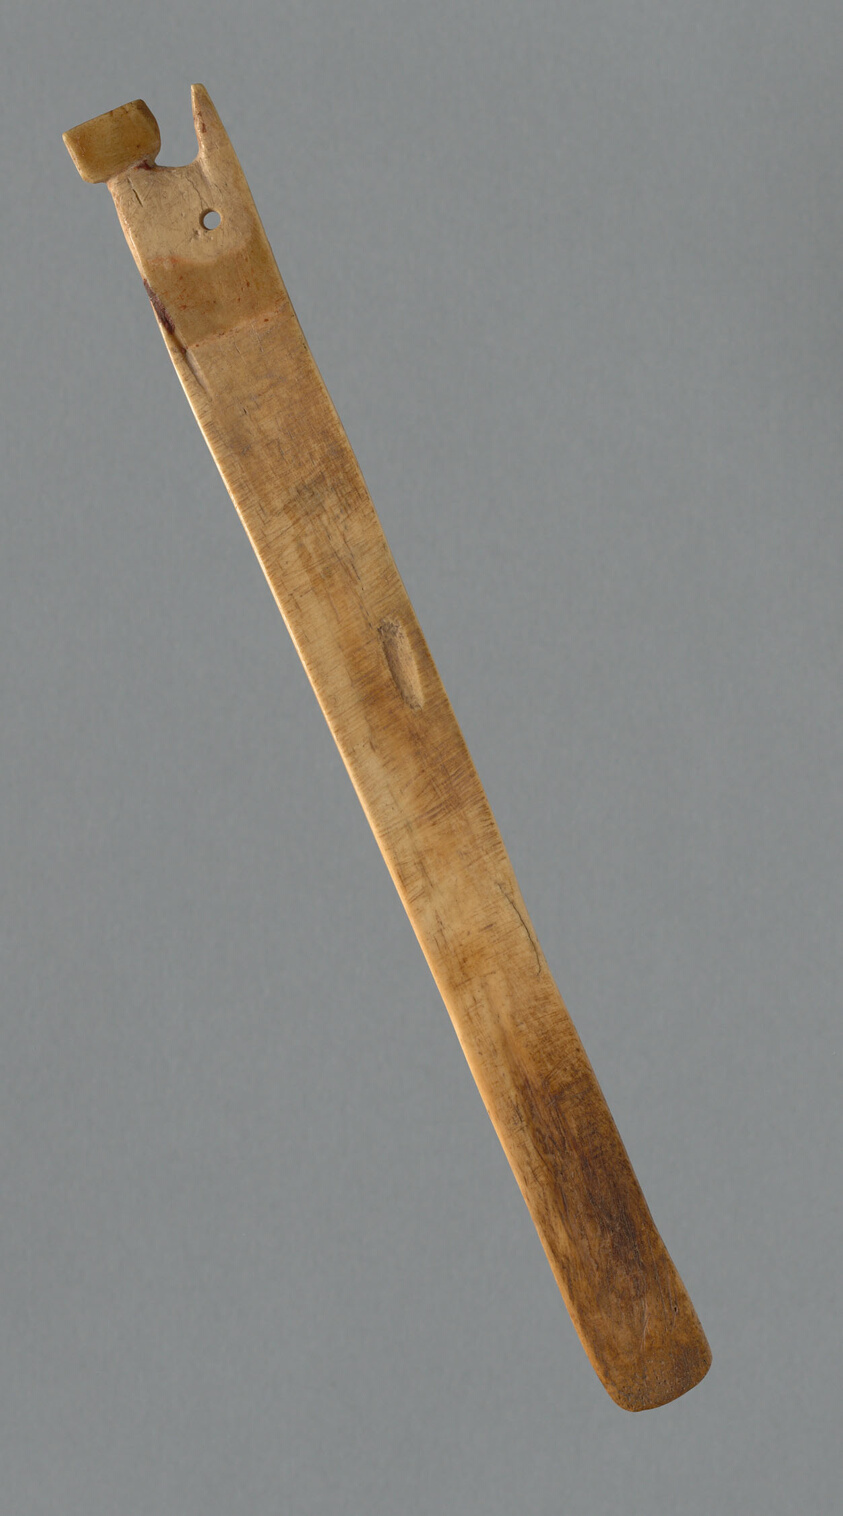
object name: non-art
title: Bone Pick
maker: Peru, Probably central coast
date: 1000/1476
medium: Bone or wood?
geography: Peru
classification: textile; weaving; textile working equipment